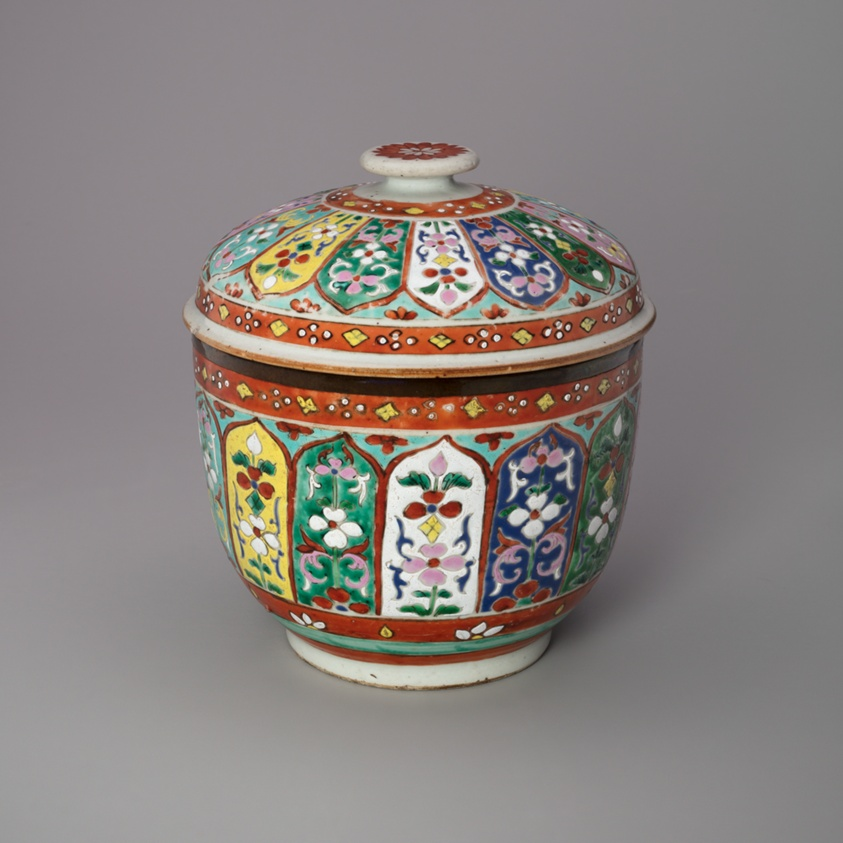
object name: Decorative Arts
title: Bencharong (Five-Colored) Ware, Covered Jar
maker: China, for the Thai Market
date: 19th century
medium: Porcelain painted in overglaze polychrome enamels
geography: China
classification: porcelain; asian art; ceramics; decorative arts